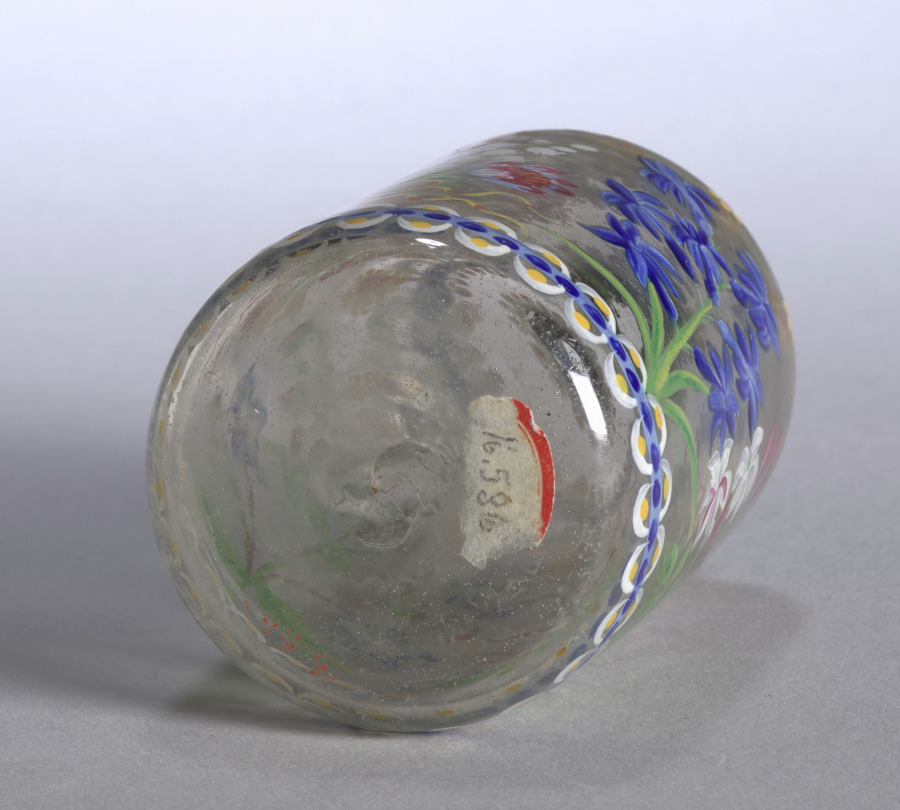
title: Scent Bottle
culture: Germany, 18th century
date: 1700s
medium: glass with enamel decoration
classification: Miscellaneous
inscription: signed: Z. F. a M.